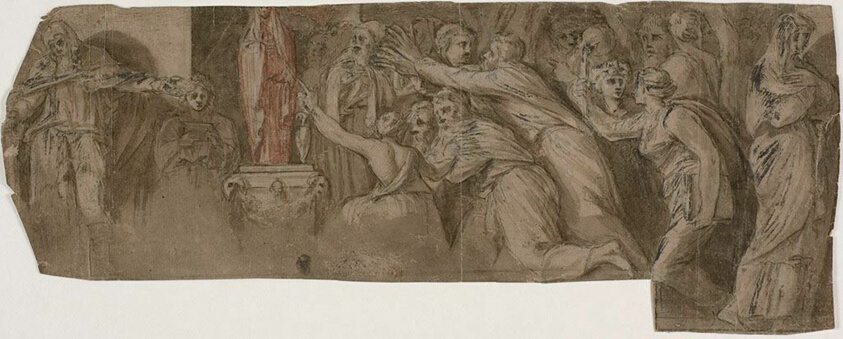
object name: Drawing and Watercolor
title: Story of Niobe: Priests and Worshippers before a Statue of Niobe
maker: After Polidoro Caldara, called Polidoro da Caravaggio; Italian, c. 1499-c. 1543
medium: Pen and brown ink, with brush and brown and red wash, heightened with lead white (oxidized), over black chalk, on tan laid paper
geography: Italy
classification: ink with wash; drawings (visual works); prints and drawing